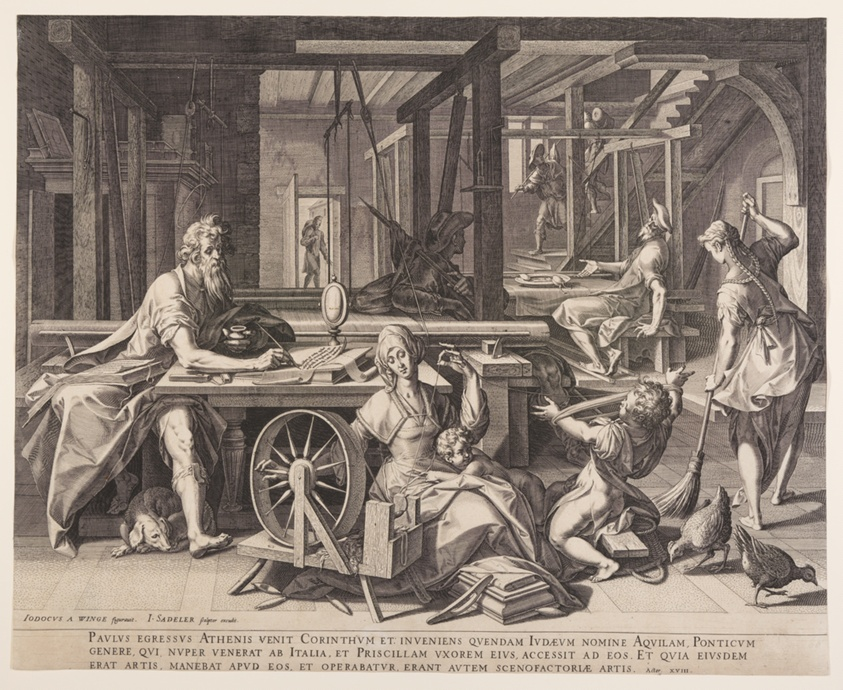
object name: Print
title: St. Paul at Corinth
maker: Jan Sadeler I (Flemish, 1550–1600); after Joos van Winghe (Flemish, 1544–1603)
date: c. 1590-1600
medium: Engraving on ivory laid paper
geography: Flanders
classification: engraving; paper; print; prints and drawing